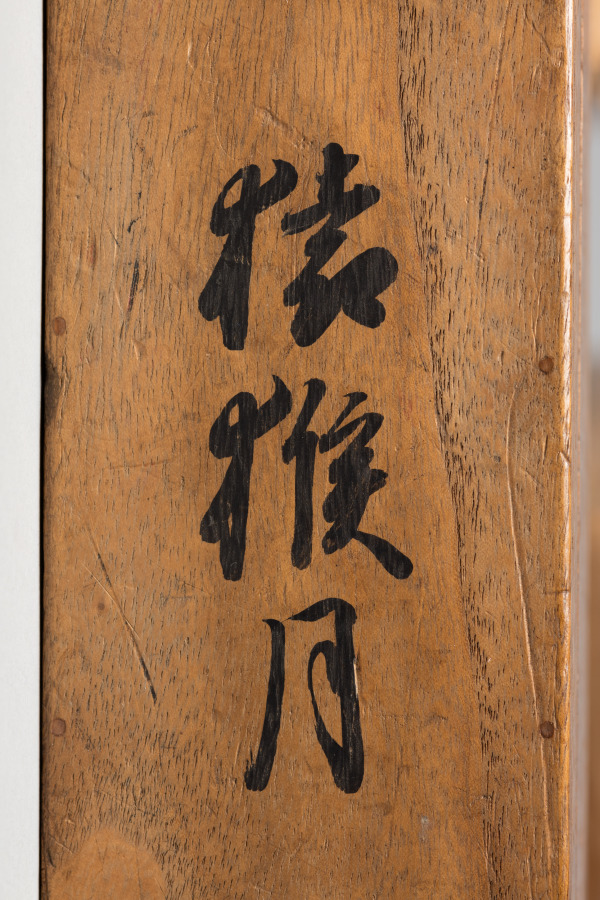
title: Gibbons Reaching for the Moon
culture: Japan, Edo period (1615–1868)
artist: Kano Tan’yū (Japanese, 1602–1674)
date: 1600s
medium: Hanging scroll; ink and light color on silk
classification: Painting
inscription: signed: "Tan'yūsai hitsu"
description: Long-armed gibbons form a chain to reach down from a tree, hoping to touch what they believe is the moon. In fact, the orb remaining beyond their grasp is the full moon’s reflection in the still surface of a pond or lake. The image is a common metaphor for the deluded mind in Buddhist thought. Gibbons do not live in Japan but were known to Japanese painters of the premodern era through paintings brought from China.